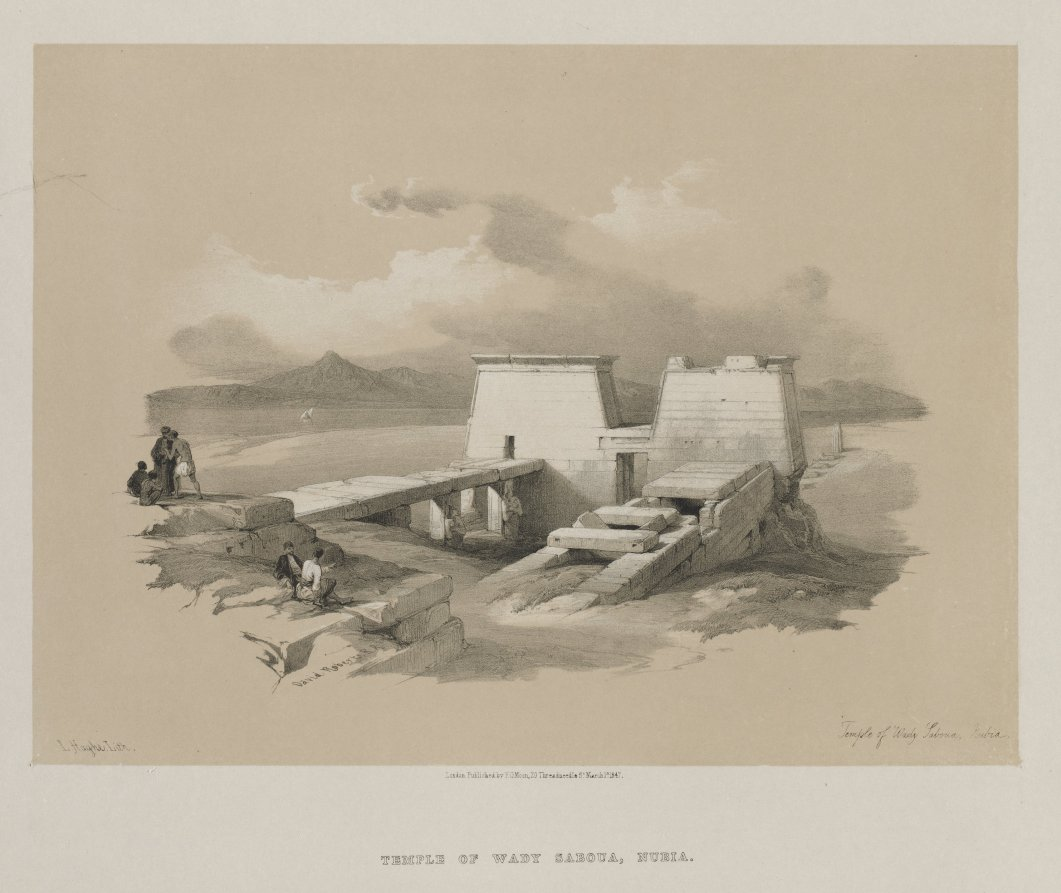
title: Egypt and Nubia, Volume I: Temple of Wady Saboua, Nubia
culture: England, 19th century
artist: Louis Haghe (British, 1806–1885)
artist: after David Roberts (Scottish, 1796–1864)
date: 1846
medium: color lithograph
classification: Print